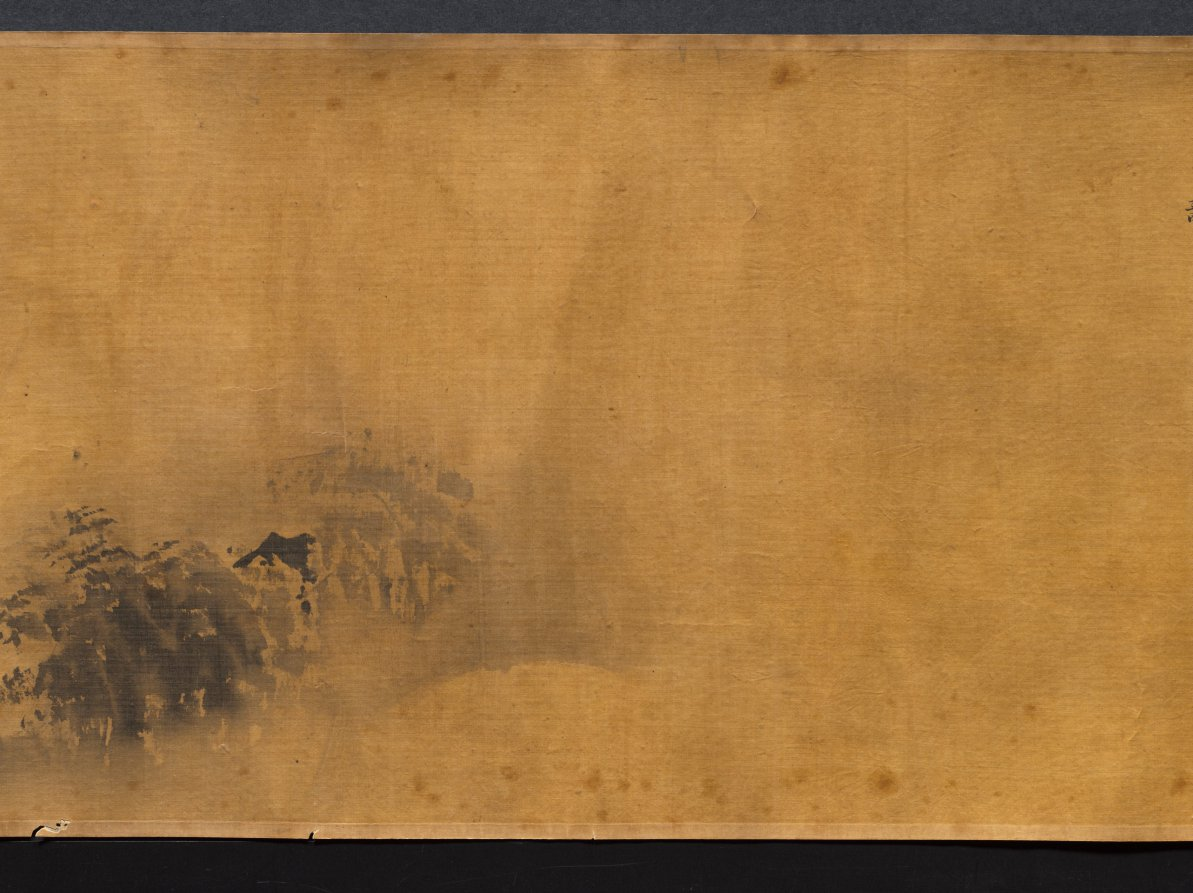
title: Eight Views of Xiao-Xiang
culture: Japan, Edo period (1615–1868)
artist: Kano Tan’yū (Japanese, 1602–1674)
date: 1615–1868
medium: handscroll; ink on silk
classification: Painting